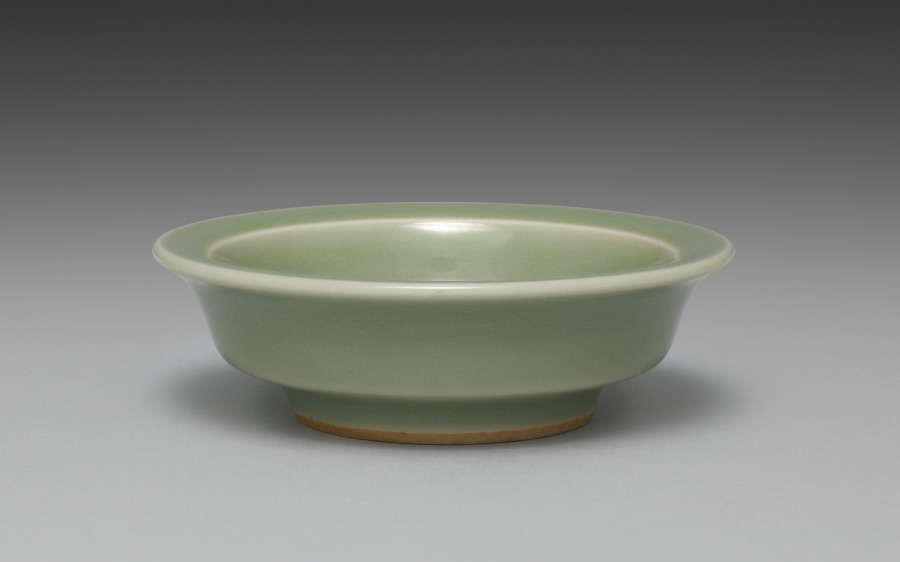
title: Saucer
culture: Japan, Meiji period (1868–1912)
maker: Seifū Yohei III (Japanese, 1851–1914)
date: 1893–1914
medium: One from a set of ten dishes; porcelain with green glaze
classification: Ceramic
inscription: 清風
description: Yohei III’s main output for his sophisticated clientele was in the form of tea sets and dining sets. He created a range of dishes in green glazes. He often produced in pairs, sets of five, or sets of ten. For this set of ten small dishes in a simple, round form that emphasizes the glaze above all, the box lid designates the piece as seiji, or green-glazed porcelain, using a general term for the extensive palette of green glazes often called celadon in English. The box lid further identifies the dishes themselves as tōchō, literally “bean-sized saucers,” a size that makes them suitable for dipping sauces.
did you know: The ten dishes in this set are stored in stacks of five in a two-compartment box.